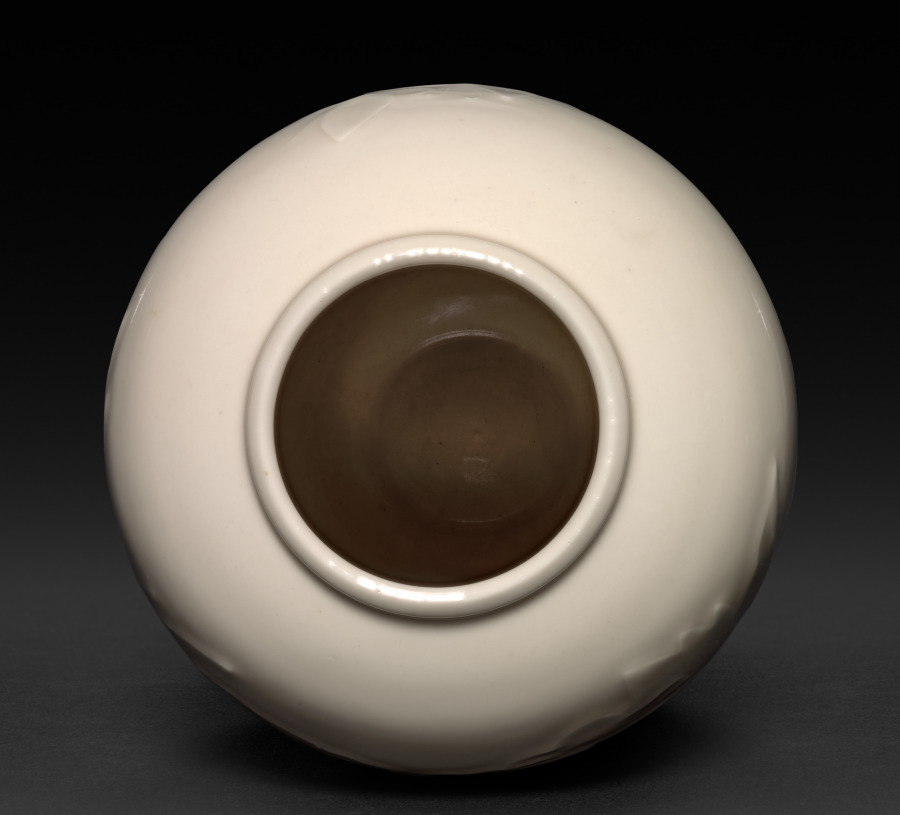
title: Vase with Peonies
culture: Japan, Meiji period (1868–1912)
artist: Seifū Yohei III (Japanese, 1851–1914)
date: 1900–1914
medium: Porcelain with molded and carved design and pink-infused cream glaze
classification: Ceramic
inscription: 清風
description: This flower vase has a creamy white glaze infused with pink. Sadly, the box has been lost, so we cannot know how it was described by the studio. However, through comparison with other works, it is possible to surmise that the work can be categorized as kanpakuji with in-glaze pink. A single huge blossom shoots up into the widest part of the vessel, near the top, so it will be visible from a distance. If this design is displayed in a space with a decorative alcove located some distance away from the entrance, even at a remove, it can announce the taste of its owner and immediately please a guest. On the other side of the vase, two butterflies, their wings overlapping, flit through the sky.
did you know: One of Seifū Yohei III’s most visually impactful techniques was to combine complex low-relief designs in clay surrounded by diffused underglaze blue or pink, which he then covered with a transparent or translucent glaze.